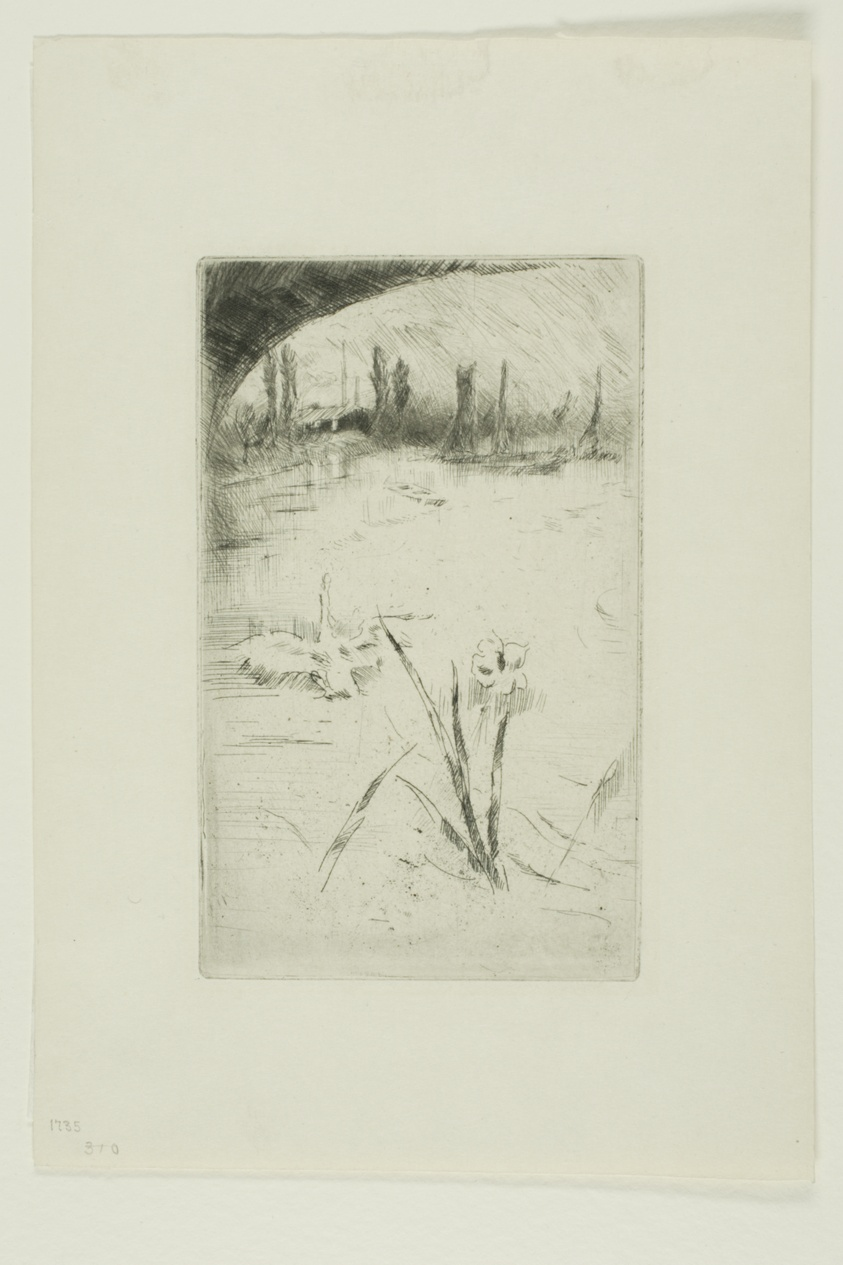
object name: Print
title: Sketch after Cecil Lawson's "Swan and Iris"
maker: James McNeill Whistler (American, 1834-1903)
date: 1882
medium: Etching and drypoint with foul biting in black ink on cream Japanese paper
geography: United States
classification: etching; foul biting; print; prints and drawing; drypoint; paper